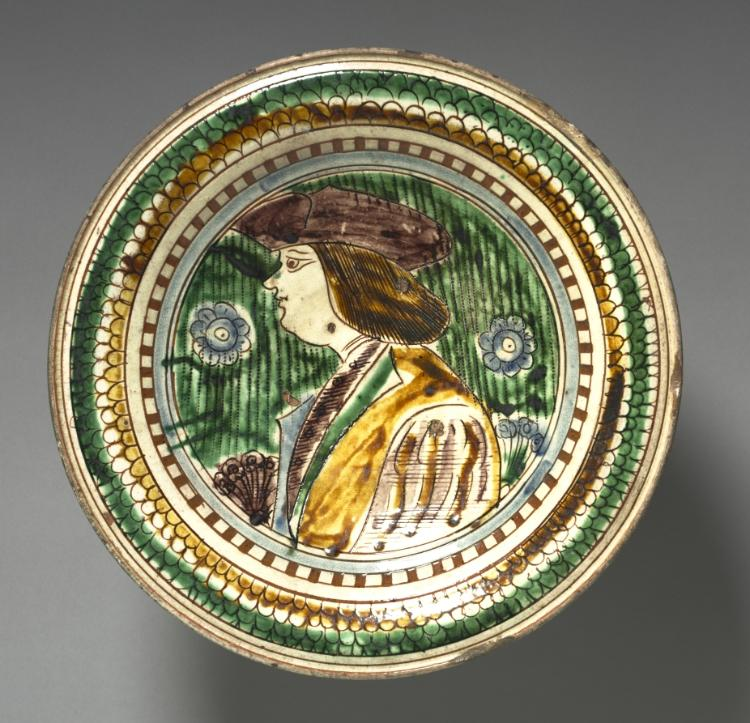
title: Plate with a Portrait of a Gentleman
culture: Italy, Ferrara, early 16th Century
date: c. 1500–1510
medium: red earthenware, incised slipware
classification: Ceramic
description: This plate is an example of incised slipware—a technique in which clay was coated with a pale-colored slip and decorated by scratching away part of the slip to reveal the darker body beneath. Although produced in the same kilns as maiolica, slipware did not require the additional expense of importing tin.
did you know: Incised slipware is an ancient technique of decorating ceramics that dates back to the Tang dynasty in China (618-907).